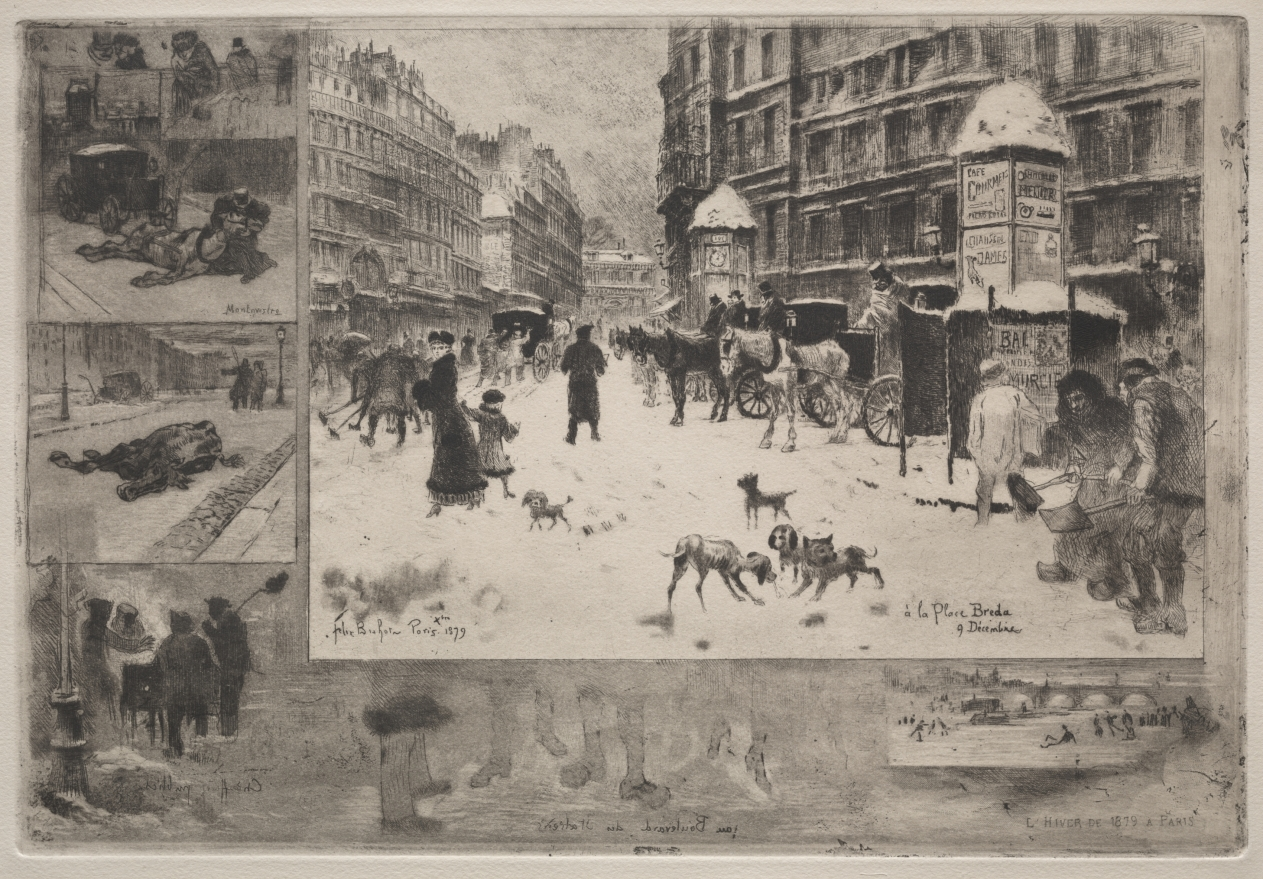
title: Winter in Paris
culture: France, 19th century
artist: Félix Hilaire Buhot (French, 1847–1898)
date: 1879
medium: etching and aquatint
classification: Print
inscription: signed and dated, in plate: "Felix Buhot Paris Xbre 1879"; inscribed, in plate: à la Place Breda 9 Décembre"; inscribed, lower right, in plate: L' HIVER DE 1879 A PARIS"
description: By 1862 and the founding of the Société des aquafortistes (Etcher's Society), there was a revival of interest amongst French painters in etching.